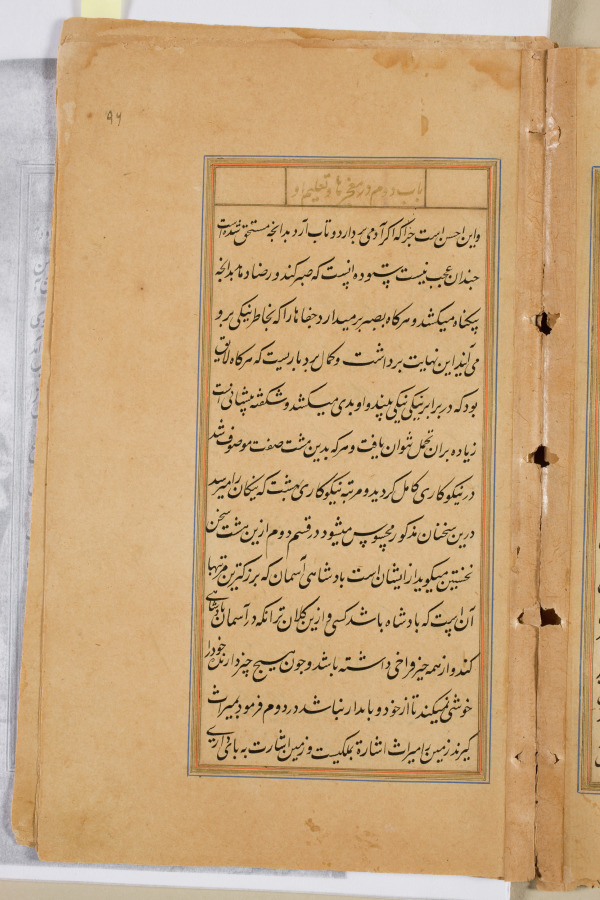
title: Text page from a Mirror of Holiness (Mir’at al-quds) of Father Jerome Xavier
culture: Mughal India, Allahabad, made for Prince Salim (1569–1627)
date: 1602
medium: Ink and gold on paper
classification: Manuscript